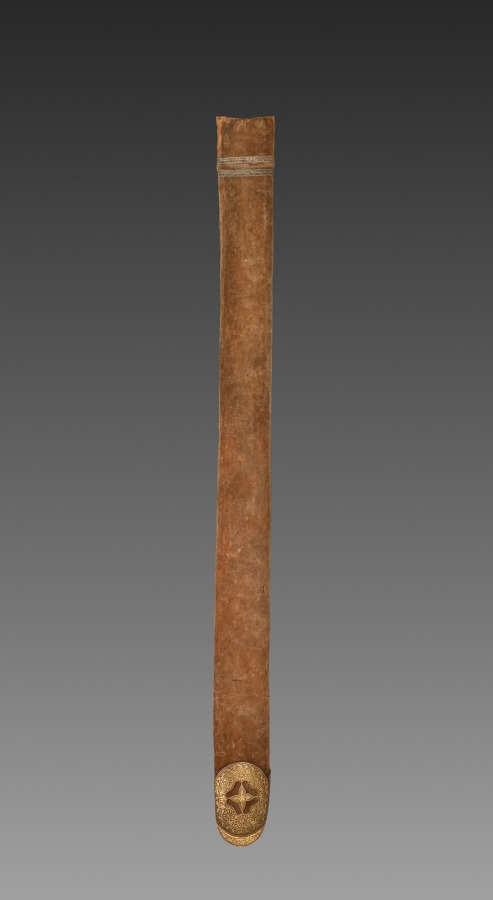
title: Scabbard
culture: India, perhaps Deccan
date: 1700s–1800s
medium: velvet lining with leather straps; wooden scabbard with velvet case and metallic threads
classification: Arms and Armor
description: Straight swords were typical of those used among military and aristocratic circles in the southern regions of the Deccan, in contrast to the curved swords favored by Central Asian equestrians. Increased contact between the Mughal north and the Deccan south during the 1600s led to the appearance of the Deccan-style sword in courtly portraits made during the time of Jahangir and Shah Jahan, and later.